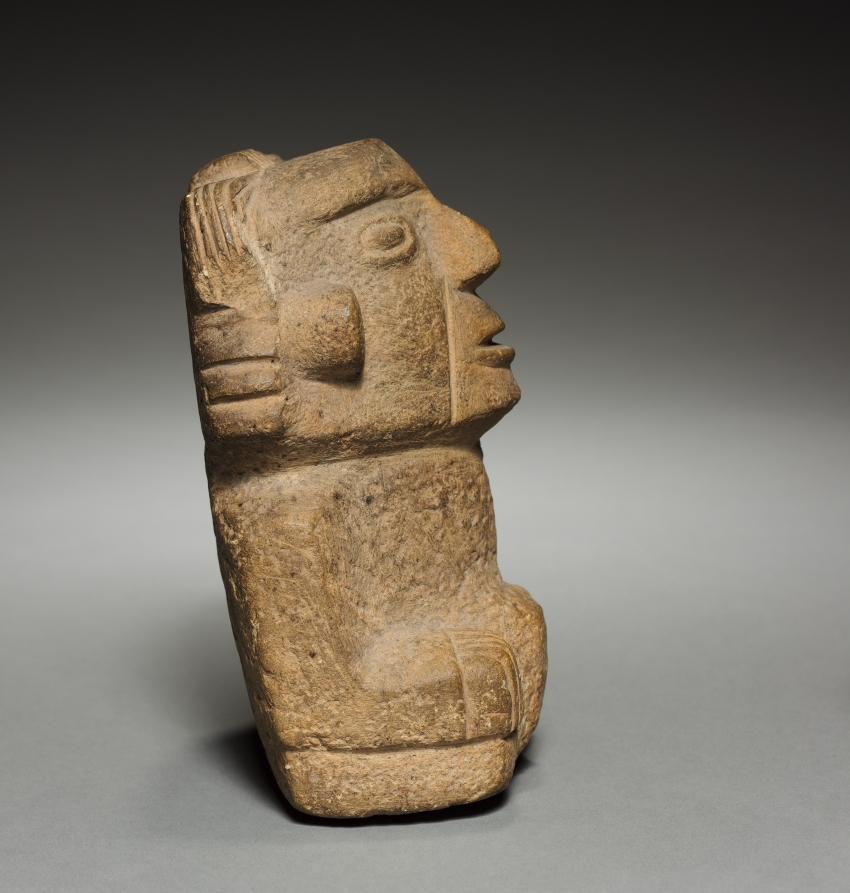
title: Seated Figure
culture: Pre-Columbian style, 20th century (?)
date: 20th Century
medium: tan stone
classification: Sculpture